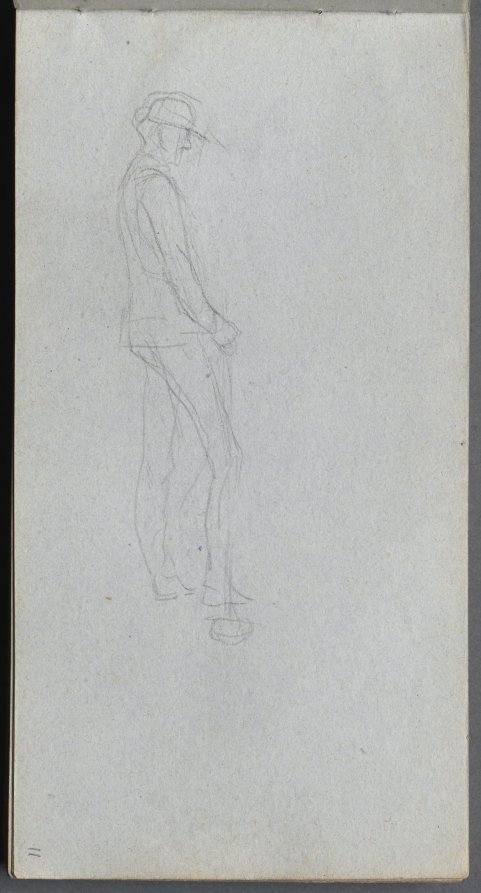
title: Sketchbook, page 11: Figure in Profile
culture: France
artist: Ernest Meissonier (French, 1815–1891)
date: c. 1860s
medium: graphite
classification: Bound Volume